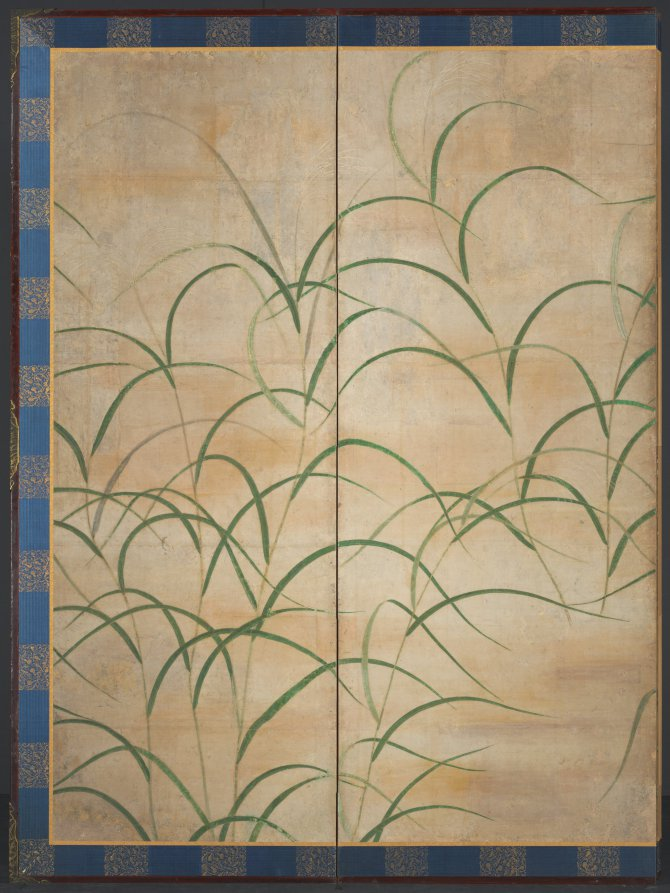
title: Susuki Grass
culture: Japan, Muromachi period (1392–1573)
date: c. 1525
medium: One of a pair of six-panel folding screens; ink, color, and gold on paper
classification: Painting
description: Susuki grass has a seasonal association with autumn in the Japanese visual and literary tradition. It is one of the “Seven Flowers of Autumn,” along with bush clover, arrowroot, pink, patrinia, mistflower, and bellflower. This composition immerses the beholder in a field of grasses and golden bands of mist. The design may have served as a backdrop for poems brushed in ink on decorated papers and attached to the surface of the screens, a practice with a long tradition in Japan.